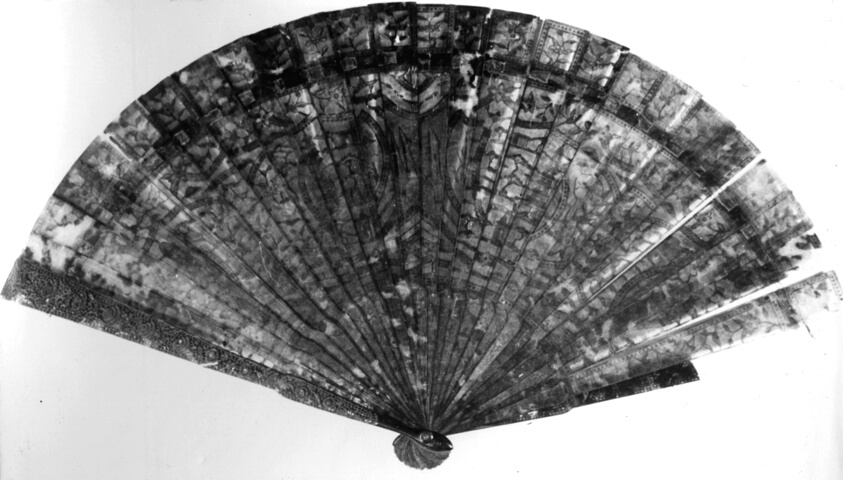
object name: Costume and Accessories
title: Fan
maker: China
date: 19th century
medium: Tortoise shell; carving, filigree type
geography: China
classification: textile; fan - misc; costume accessory - folding fan; costume